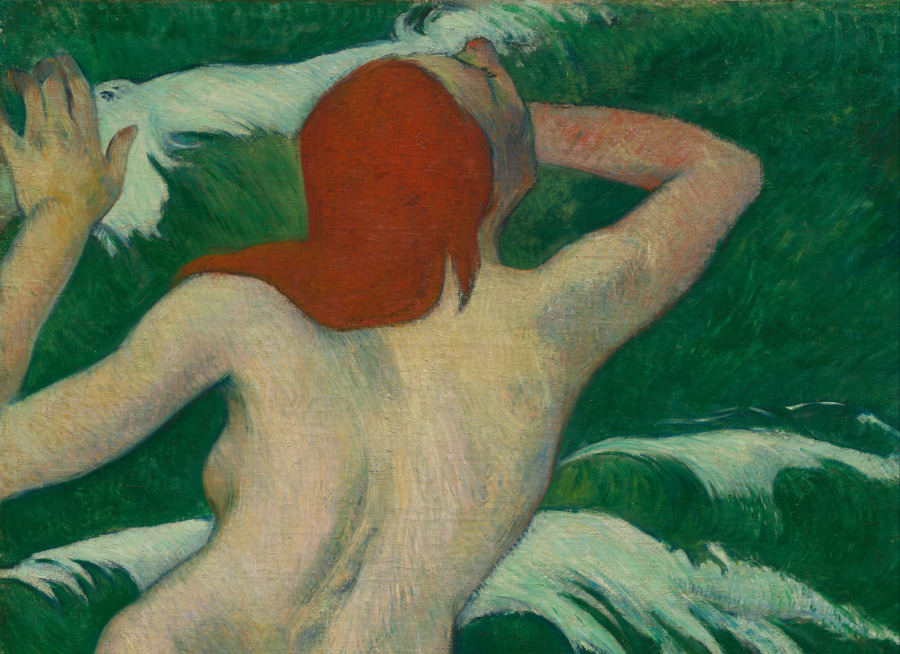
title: In the Waves (Dans les Vagues)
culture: France, 19th century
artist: Paul Gauguin (French, 1848–1903)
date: 1889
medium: oil on fabric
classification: Painting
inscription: Signed lower center: P Gauguin. 89-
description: Painted at Pont-Aven in northwest France, this depiction of a nude figure throwing herself into the sea suggests a metaphor for a modern European woman forsaking civilization and abandoning herself to her natural, primitive instincts. The simplified lines and exaggerated colors, especially the contrasting green and orange, seem invented rather than observed from life. Exhibiting the painting at the Café Volpini in Paris in 1889, Gauguin established himself as a leader of the Symbolist movement in art.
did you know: Gauguin likely painted this work of art during his time in a small coastal village called Pont-Aven where he sought to immerse himself in nature and escape modern civilization.